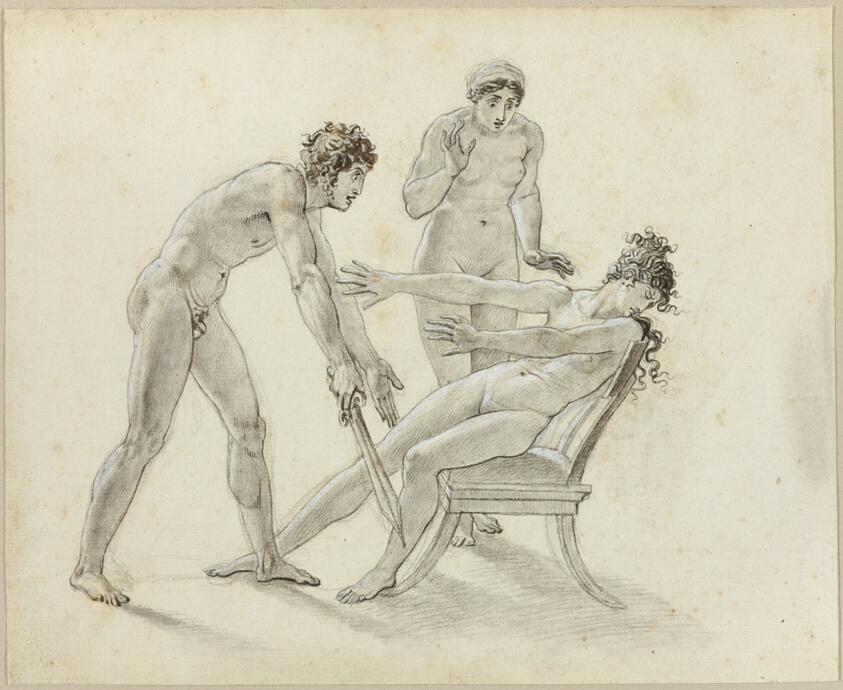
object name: Drawing and Watercolor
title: Hermione Rejecting Orestes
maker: Anne-Louis Girodet de Roucy-Trioson; French, 1767-1824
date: c. 1799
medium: Pen and black ink and black chalk, with stumping, and brush and brown and gray wash, heightened with white gouache, on ivory laid paper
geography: France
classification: pen and ink drawings; drawings (visual works); prints and drawing